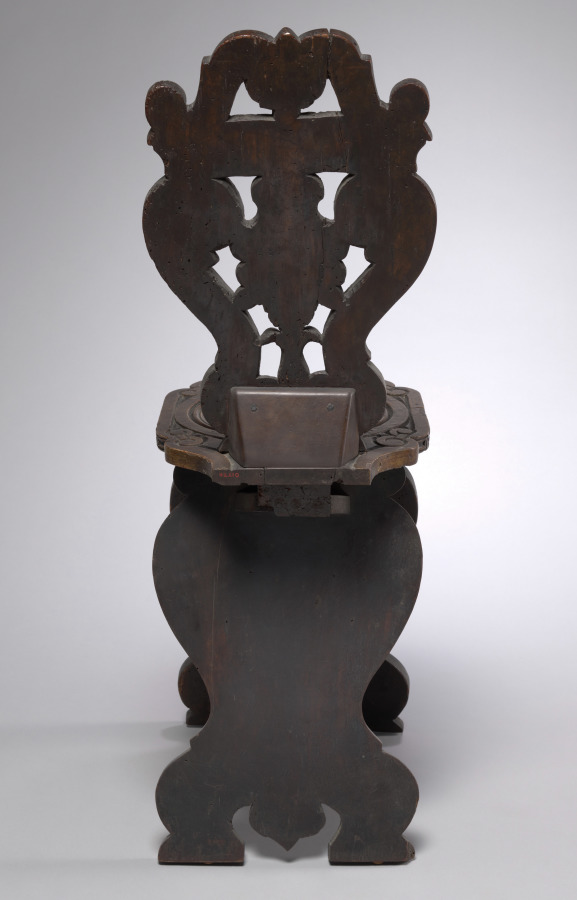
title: Chair, Sgabello type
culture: Italy, late 16th century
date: late 1500s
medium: walnut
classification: Furniture and woodwork